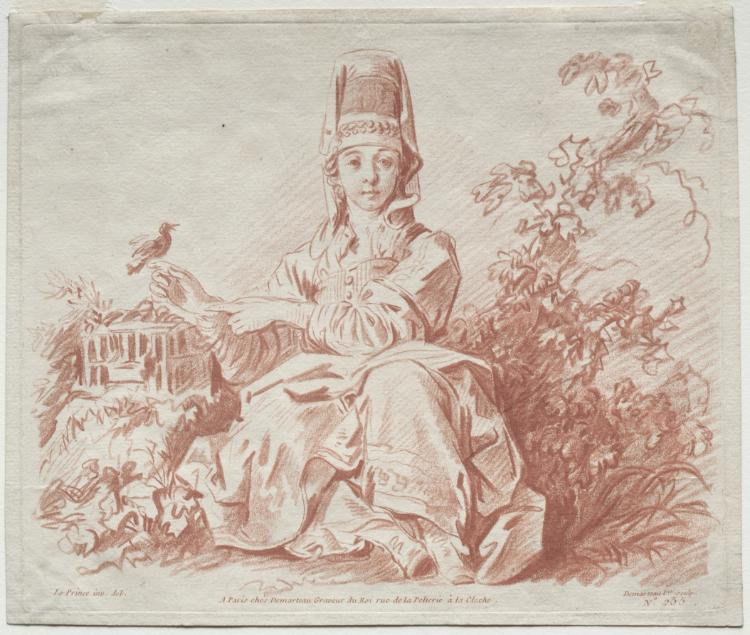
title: Young Girl Holding a Bird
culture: France, 18th century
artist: Gilles Demarteau (French, 1722–1776)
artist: after Jean Baptiste Le Prince (French, 1734–1781)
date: mid-1700s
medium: chalk-manner etching and engraving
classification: Print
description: In 1757, a printmaker named Jean-Charles François developed a printing technique to make facsimiles of chalk drawings. He perfected his method by inventing tools with toothed points of varying thicknesses set at irregular intervals and angles, imitating the random character of grains of chalk on textured paper. Gilles Demarteau adopted François's specialized implements to copy the chalk drawings of such well-known artists as Jean Baptiste le Prince and François Boucher.